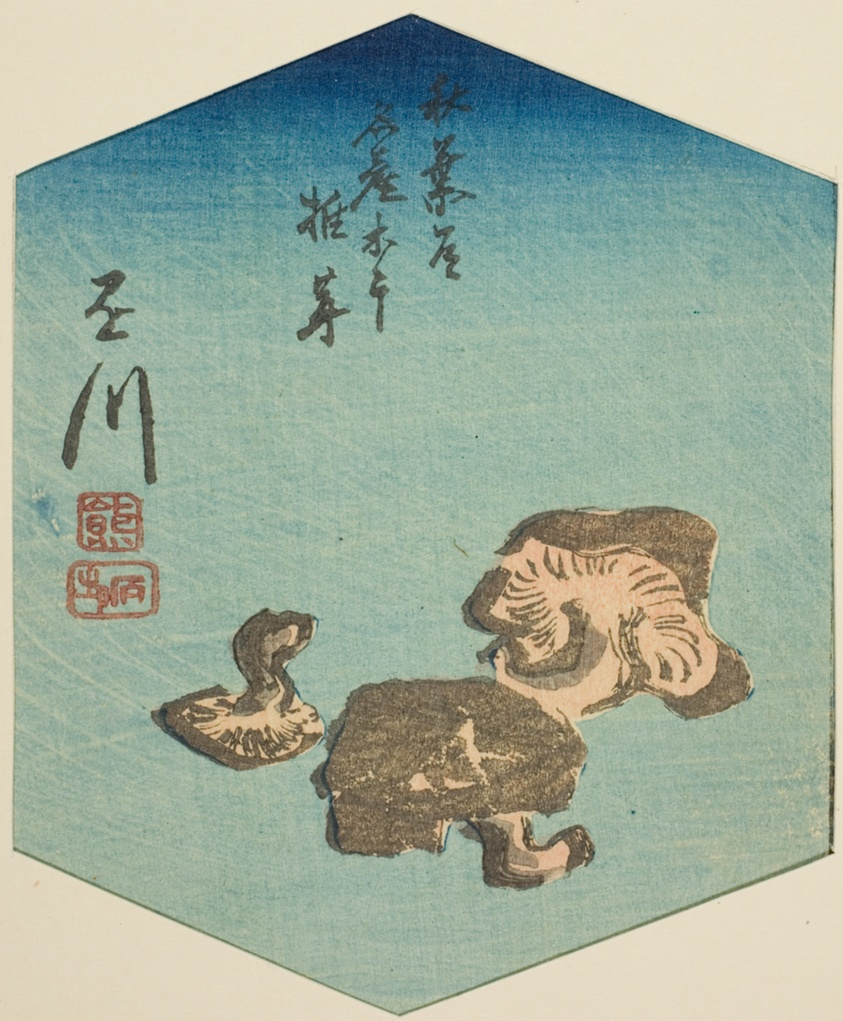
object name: Print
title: Kakegawa, section of sheet no. 7 from the series "Cutout Pictures of the Tokaido Road (Tokaido harimaze zue)"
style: Japanese (culture or style)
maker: Utagawa Hiroshige 歌川 広重; Japanese, 1797-1858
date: c. 1848/52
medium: Color woodblock print; section of harimaze sheet (uncut sheet: 1939.1299)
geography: Japan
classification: woodblock print; print; asian art